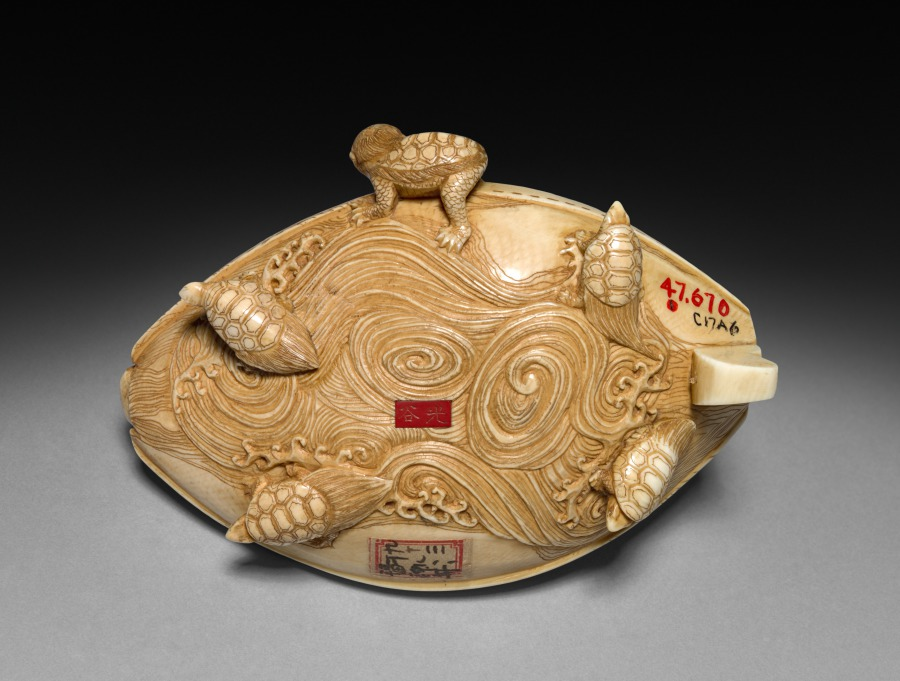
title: Boat with Six Passengers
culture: Japan, Edo period (1615–1868) to Meiji period (1868–1912)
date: c 1800s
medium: ivory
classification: Netsuke